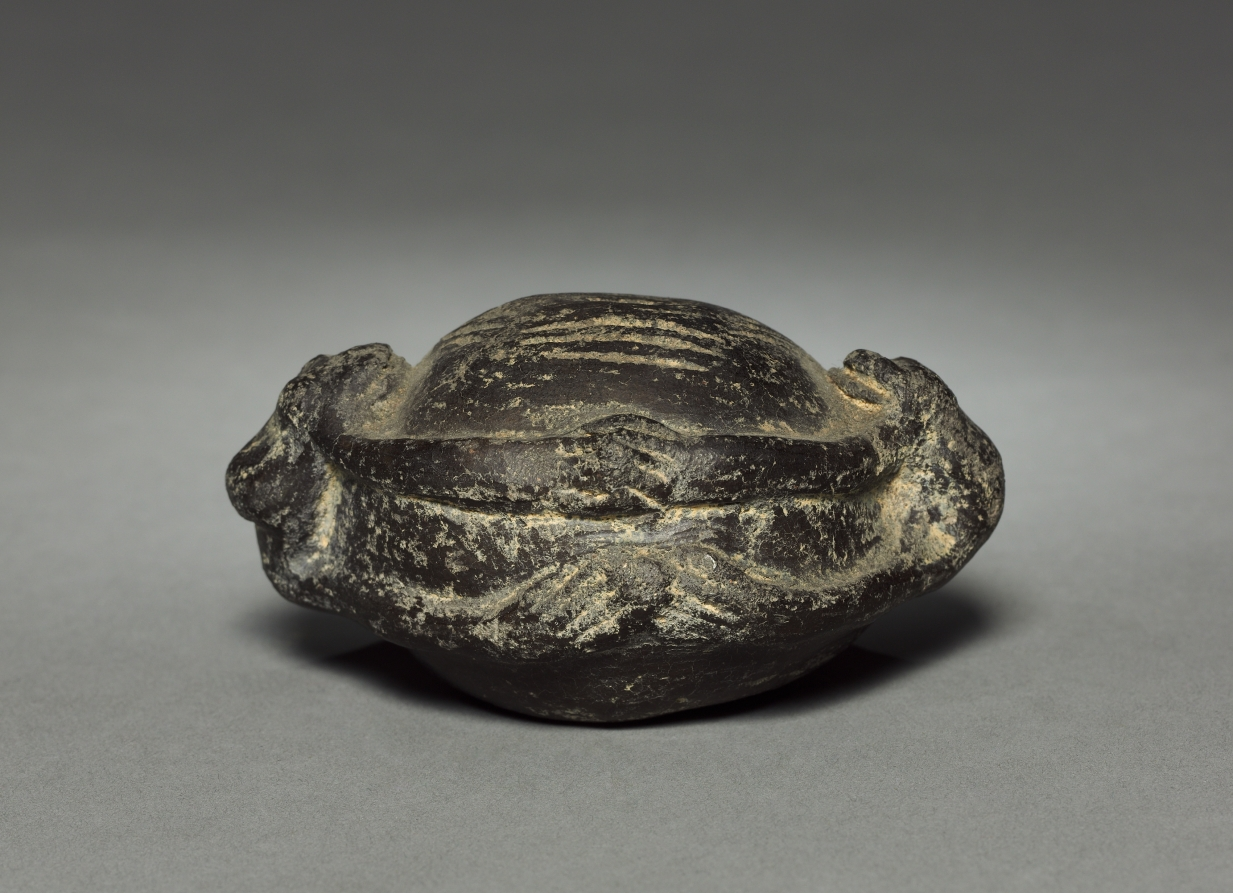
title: Jar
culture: Colombia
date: before 1921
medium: pottery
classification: Ceramic